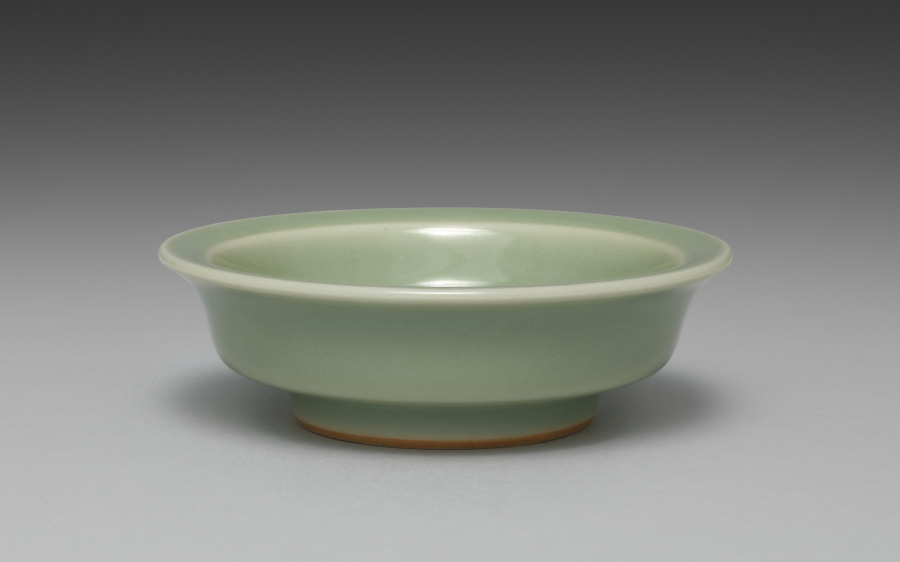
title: Saucer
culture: Japan, Meiji period (1868–1912)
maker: Seifū Yohei III (Japanese, 1851–1914)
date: 1893–1914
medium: One from a set of ten dishes; porcelain with green glaze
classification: Ceramic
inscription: 清風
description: Yohei III’s main output for his sophisticated clientele was in the form of tea sets and dining sets. He created a range of dishes in green glazes. He often produced in pairs, sets of five, or sets of ten. For this set of ten small dishes in a simple, round form that emphasizes the glaze above all, the box lid designates the piece as seiji, or green-glazed porcelain, using a general term for the extensive palette of green glazes often called celadon in English. The box lid further identifies the dishes themselves as tōchō, literally “bean-sized saucers,” a size that makes them suitable for dipping sauces.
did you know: The ten dishes in this set are stored in stacks of five in a two-compartment box.